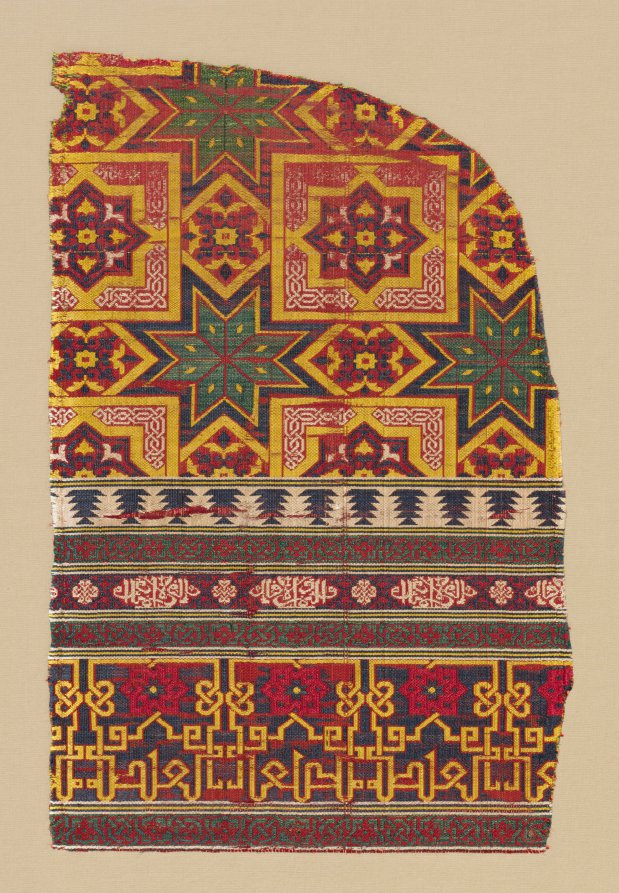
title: Alhambra hanging fragment with decorated bands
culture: Spain, Granada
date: 1300s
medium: Silk: lampas and taqueté weave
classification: Textile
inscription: the principal field of geometric laceria forming stars and squares is bordered by a broad composite band (incomplete) consisting of central wide band with knotted Kufic inscription ("beatitude"), framed by narrower bands with knotwork, Naskhi inscriptions ("success and prosperity") in cartouches and crenallations.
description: The ability to harmoniously combine intricate designs and varied colors was one of the unparalleled achievements of Islamic art. This silk curtain fragment reveals juxtapositions of large- and small-scaled patterns, woven with bold contrasting colors in bands of varying widths. Segments of Arabic text have been woven into the design. The repeated phrase good fortune and prosperity is woven in ivory silk in one of the narrow bands. In the wide band at the bottom, Kufic script in yellow silk extends the word beatitude.